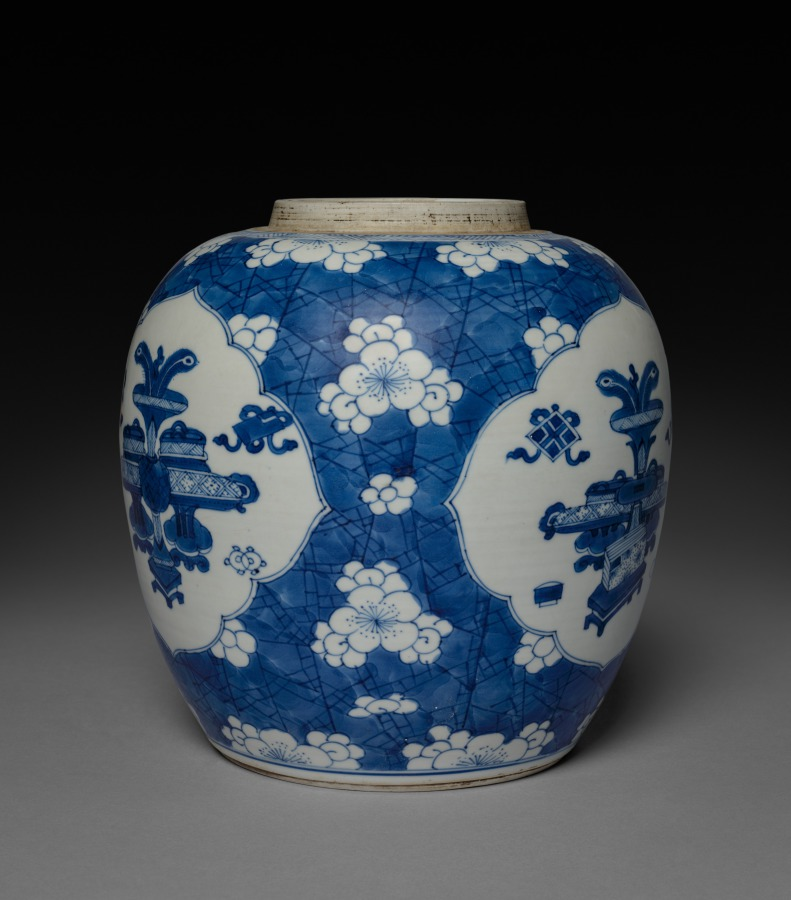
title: Ginger Jar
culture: China, Qing dynasty (1644-1911), Kangxi reign (1662-1722)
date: 1662–1722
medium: porcelain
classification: Ceramic